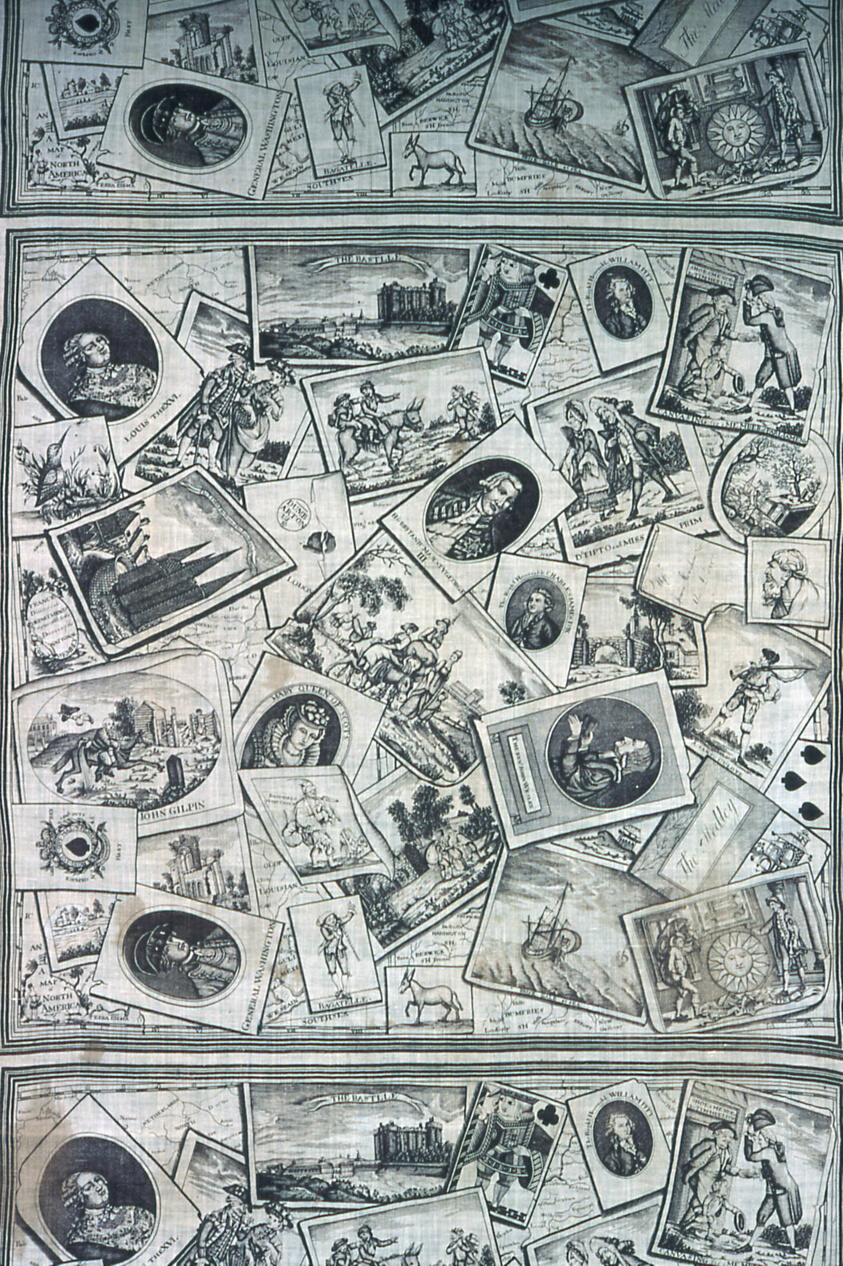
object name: Textile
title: The Medley (Handkerchief)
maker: William Gilpin (English, 1724-1804); England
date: 1792/95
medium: Cotton, plain weave; copperplate printed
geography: England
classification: textile; weaving - printed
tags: propaganda